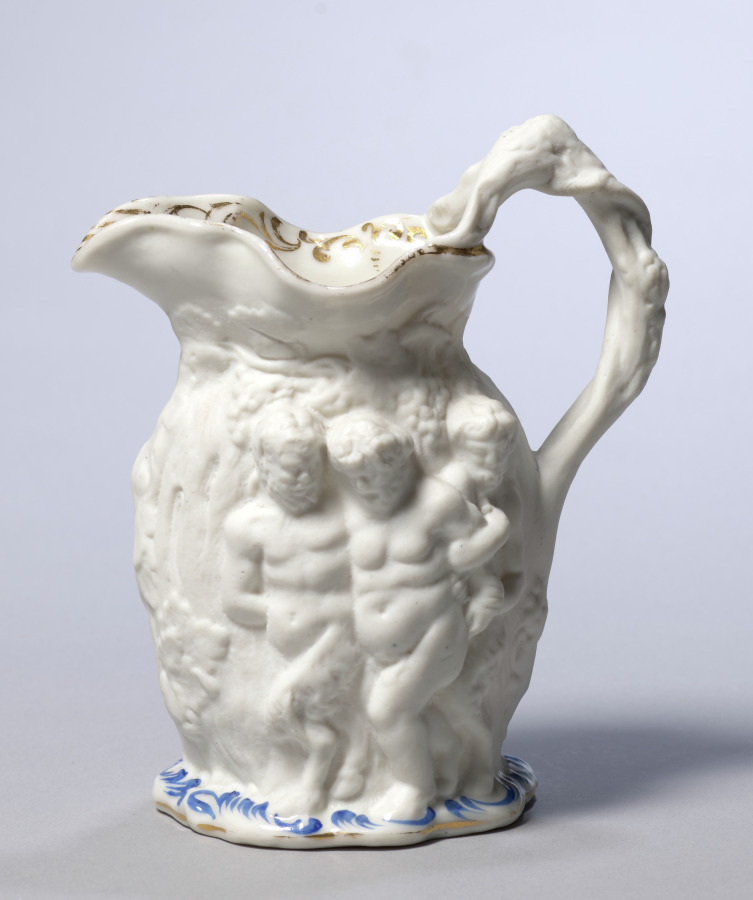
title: Jug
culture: France, 19th century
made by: Jacob Petit (French)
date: 1800s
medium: ceramic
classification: Ceramic